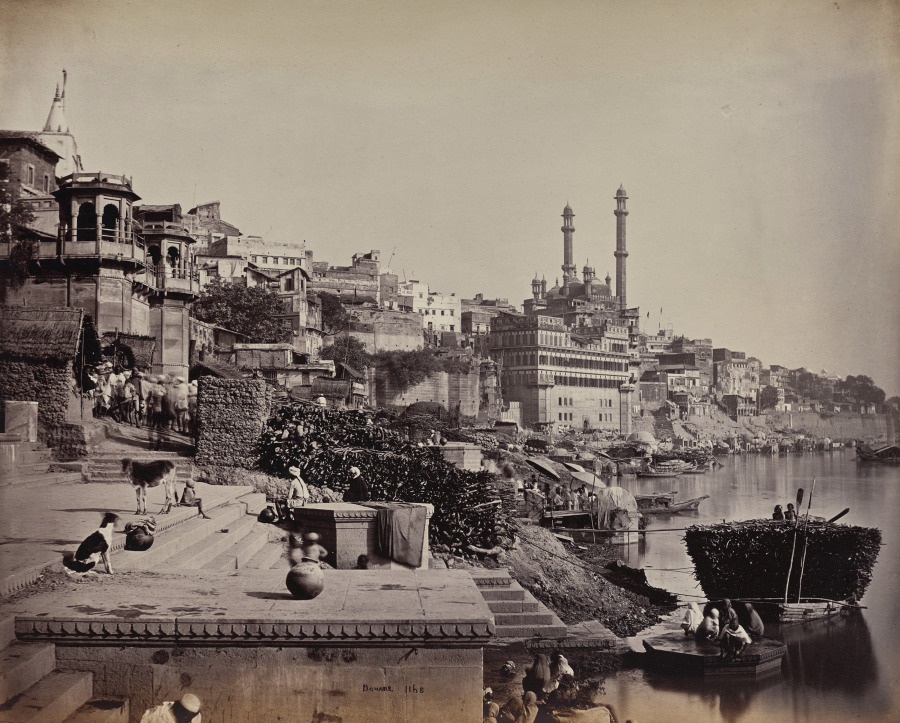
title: The City of Benares, on the Ganges, View of the Great Mosque of A (?) and Adjoining Landing Places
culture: England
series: Photographs of Northern India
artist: Samuel Bourne (British, 1834–1912)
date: 1863–70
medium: albumen print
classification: Photograph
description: The 50 images in this album, all taken in the 1860s, move from the hill towns of the Himalayas down to cities including Lahore (now in Pakistan), Delhi, Lucknow, Agra, Benares (now Varansi), and Calcutta (now Kolkata). Architectural studies of major monuments offer valuable historical records of what sites such as the Taj Mahal and the imperial mosque of the Mughal emperors in Delhi looked like before 20th-century restorations.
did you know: Samuel Bourne, the author of most the images in this album, was a banker in England before he moved to India to become a professional photographer.